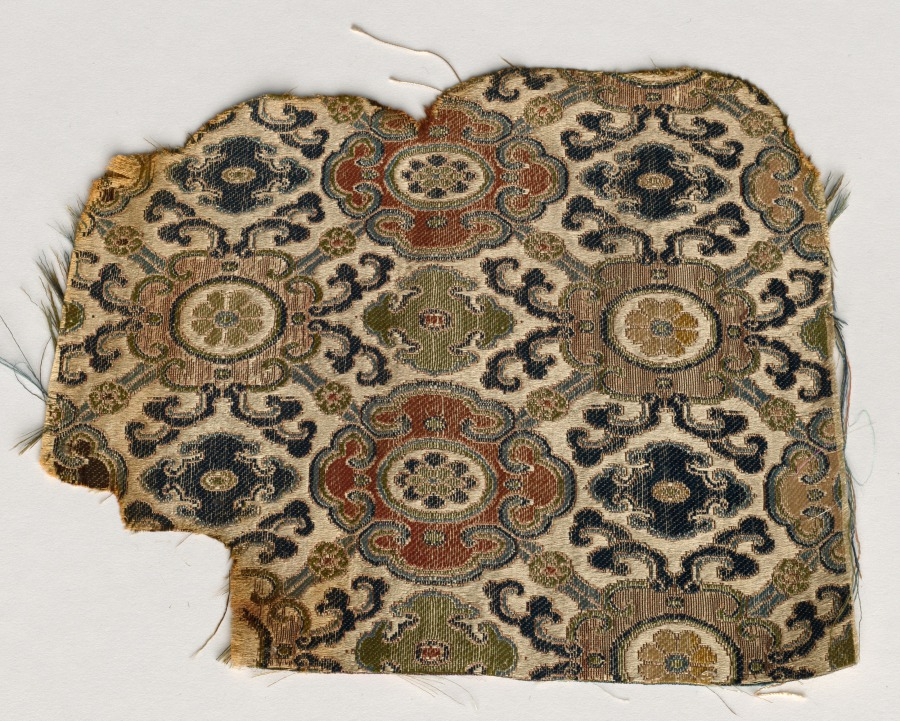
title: Fragment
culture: China, 19th century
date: 1800s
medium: silk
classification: Textile